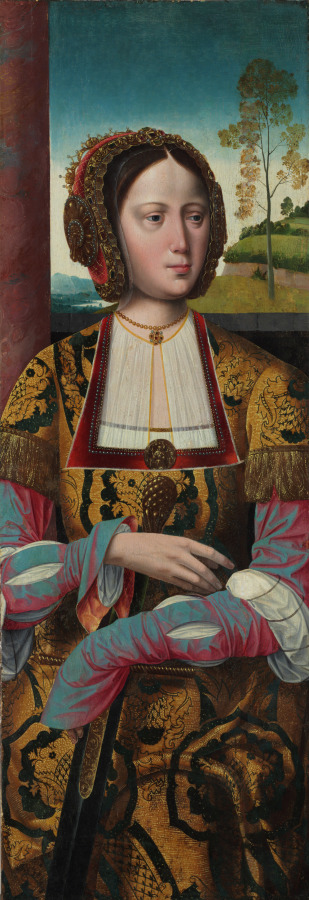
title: Saint Catherine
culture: Flanders, Bruges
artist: Master of the Holy Blood (Netherlandish)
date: c. 1520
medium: tempera on wood panel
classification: Painting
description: Saint Catherine holds the sword with which she was martyred. This painting and another in the collection (1942.633.2) were originally the wings of an altarpiece flanking a central panel, now lost, that may have depicted the Holy Family. The identity of this artist is unknown, but he is named for a painting in the Chapel of the Holy Blood in Bruges. Bruges flourished as an international commercial center through the 1400s and early 1500s. Among its residents were many foreign merchants and bankers who, along with the Burgundian court, patronized artists and attracted specialized craftsmen such as furriers, hatters, jewelers, and goldsmiths. Bruges’s artistic production in the 1400s included celebrated artists like Jan van Eyck, Petrus Christus, Hans Memling, and Gerard David who painted large altarpieces, small panels for private devotion, and portraits. Bruges also remained an important center for the production of illuminated manuscripts.